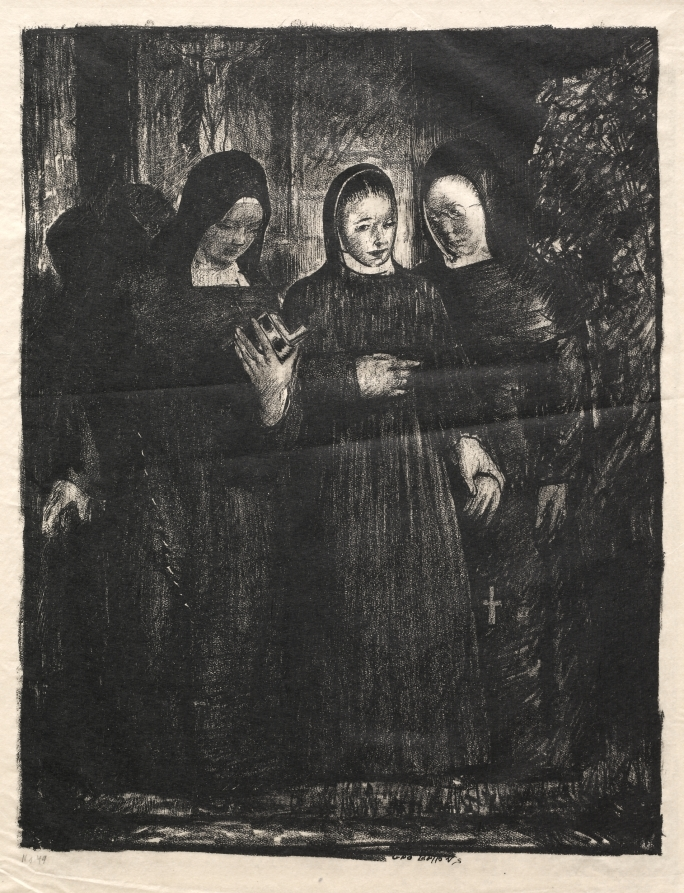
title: The Novitiate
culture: America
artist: George Bellows (American, 1882–1925)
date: 1916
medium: lithograph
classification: Print